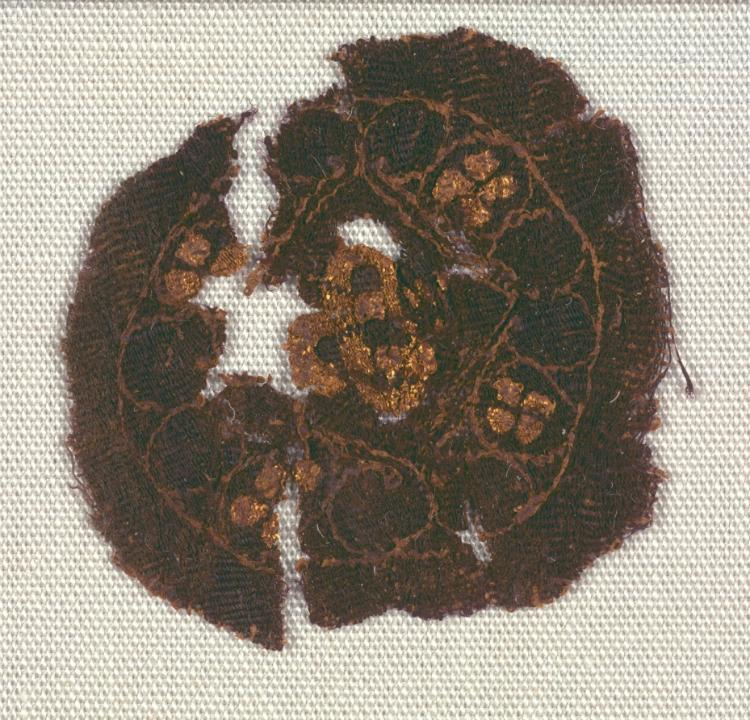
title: Round Segmentum from a Tunic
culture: Egypt, Byzantine period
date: 300s–400s CE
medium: tapestry (probably inwoven in tabby ground); wool, linen, and gold foil around silk core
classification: Textile